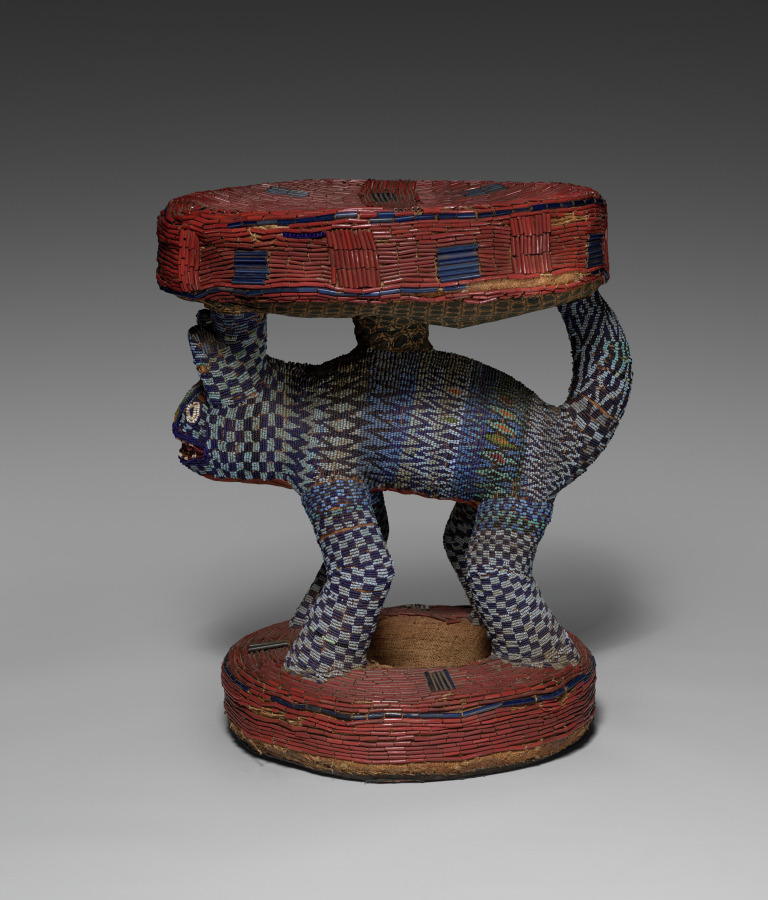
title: Prestige stool (Kuo fo)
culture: Africa, Central Africa, Cameroon, Bandjoun Kingdom, Bamileke makers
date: possibly 1800s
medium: Wood, cotton, plant fiber, glass beads, and indigo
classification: Furniture and woodwork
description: Bead-covered wooden stools and thrones are one of the most prevalent art forms among the various kingdoms and chiefdoms in the Cameroon Grassfields region. This example, once part of the royal treasury, belongs in the category of "travel stools," usually used in conjunction with more private, minor ceremonies and rituals at the palace. The leopard imagery confirms the object’s royal status. It alludes to the belief that the king could temporarily transform himself into this feared predator.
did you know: The beads on this stool were sewn on by hand. Look underneath the stool, however, and you can see commercially made printed fabric.